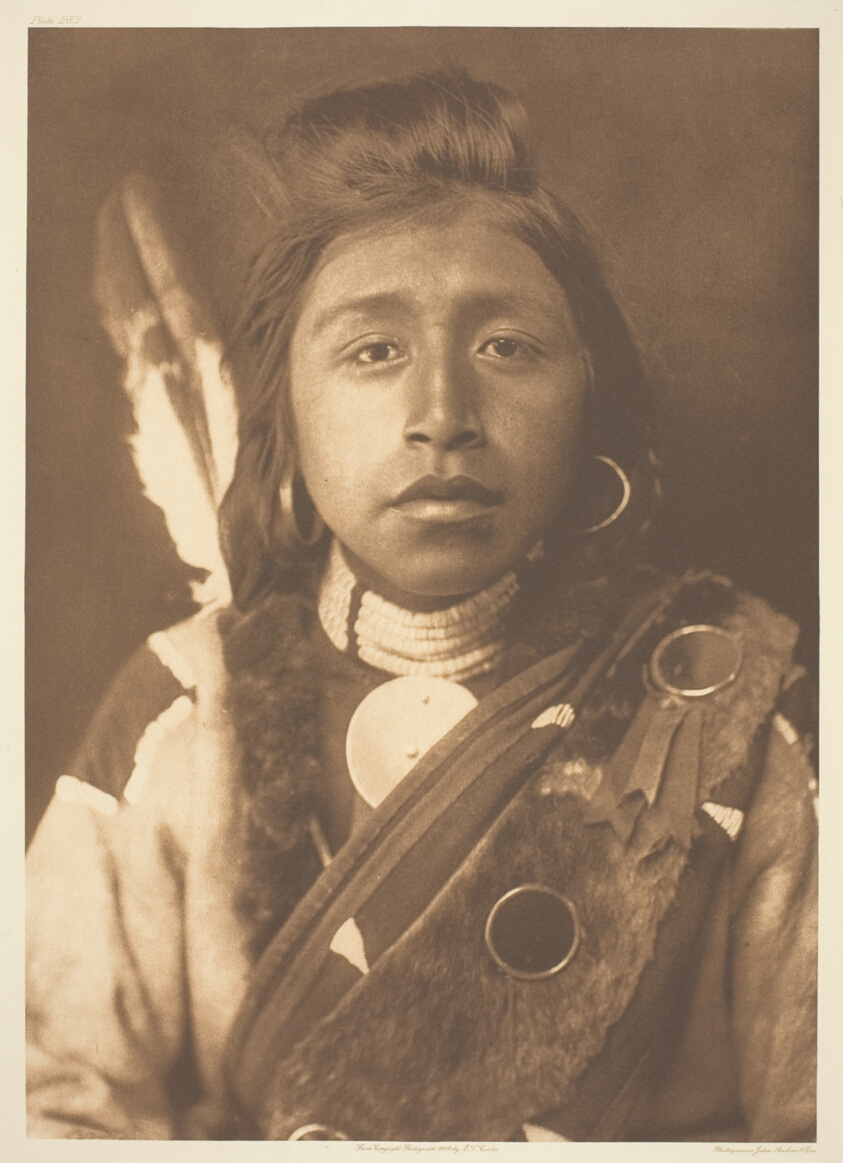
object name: Photograph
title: Kashhila-Wishham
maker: Edward S. Curtis (American, 1868–1952)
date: 1909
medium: Photogravure, plate 283 from "The North American Indian, Volume 8" (1911)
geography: United States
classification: photogravure; photomechanical process; photography; photograph